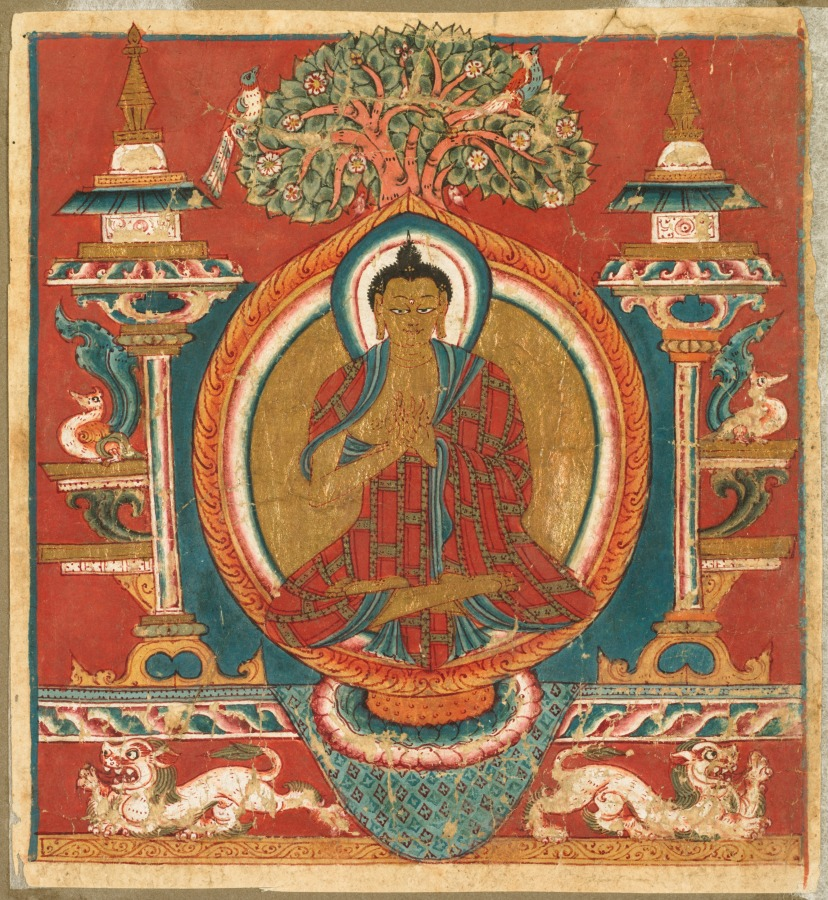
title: Votive initiation card (tsakali) with preaching Buddha Shakyamuni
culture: Western Tibet, Tholing Monastery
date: 1000s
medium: Gum tempera, ink, and gold on paper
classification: Painting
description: Buddhism was introduced to Tibet in the 7th century, but the persecution that followed in the 9th and 10th centuries destroyed all artifacts of the period. Consequently the earliest existing Buddhist art from Tibet dates to the 11th and 12th centuries, the so-called period of the Second Diffusion of Buddhism, yet few 11th- or 12th-century paintings survive. This miniature painting is one of these rare paintings. Not a manuscript illustration, it was conceived as a separate votive painting, a so-called tsa-kali. It was recovered from the Tholing Monastery, which was founded by Rinchensangpo (958-1055), the famous translator of Buddhist scriptures, who acted on the order of Yesheö, the king of Guge. Yesheö was also the father of "Lhatsun Nagaraja" (active 998-1026) whose name is inscribed on the museum's early Himalayan bronze statue of a Standing Buddha (1966.30)—one of the most important and beautiful Himalayan bronzes to survive. The museum's collection includes another important sculpture from the western Himalayas: the colorful wooden sculpture of a Seated Buddha (1986.6). The two sculptures date from the 11th century and provide a meaningful comparison with this painting, which replicates their style.